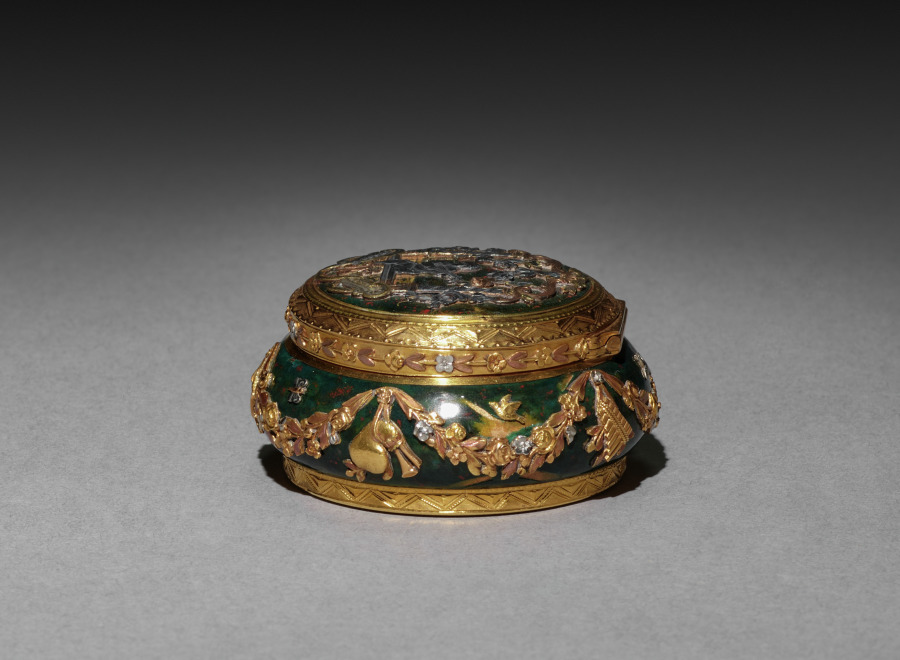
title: Bonbonniere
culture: France, 19th century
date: 1850–1899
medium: bloodstone (?) mounted in colored golds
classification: Miscellaneous